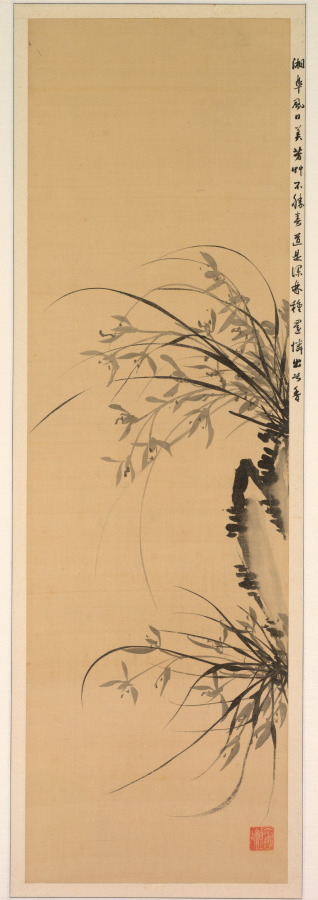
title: Orchids and Rocks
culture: Korea, Joseon dynasty (1392–1910)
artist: Yi Ha-eung (Korean, 1820–1898)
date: 1897–98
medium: Eight-panel folding screen; ink on silk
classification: Painting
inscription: Translation: [I] painted for the high minister Yangwon. [I] humbly request your corrections and advice [on my painting]. [By] an eighty-year old gentleman of rocks.)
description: Yi Ha-eung (1820−1898), the artist of this eight-panel folding screen, was one of the most influential men in late 19th-century Korea. Acting as the regent for his son, King Gojong (1852−1919), who ascended the throne at the age of thirteen, Yi ruled Korea from 1866 to 1873. In addition to his illustrious political career, Yi was also recognized as one of the most celebrated artists who led the revival of literati art in late 19th-century Korean art. In particular, he was recognized as the master of orchids, one of the “Four Gentlemen” (plum, orchid, chrysanthemum, and bamboo) themes. Solely relying on monochrome ink, Yi depicted the curvilinear silhouettes of cymbidium orchid leaves dramatically hanging down from cliffs. Growing in wilderness and redolent with fragrance, orchids were often associated with the perseverance of principled gentlemen, and thus became one of the most popular subjects of scholar-artists' paintings.On the upper right corner of the far left panel, Yi wrote a short inscription stating that he painted the work at the age of 80.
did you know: The artist of this elegant painting is the formidable politician Yi Ha-eung (1820–1898), who is known for a seclusion policy that aimed to protect Korea and its sovereignty from foreign influences.